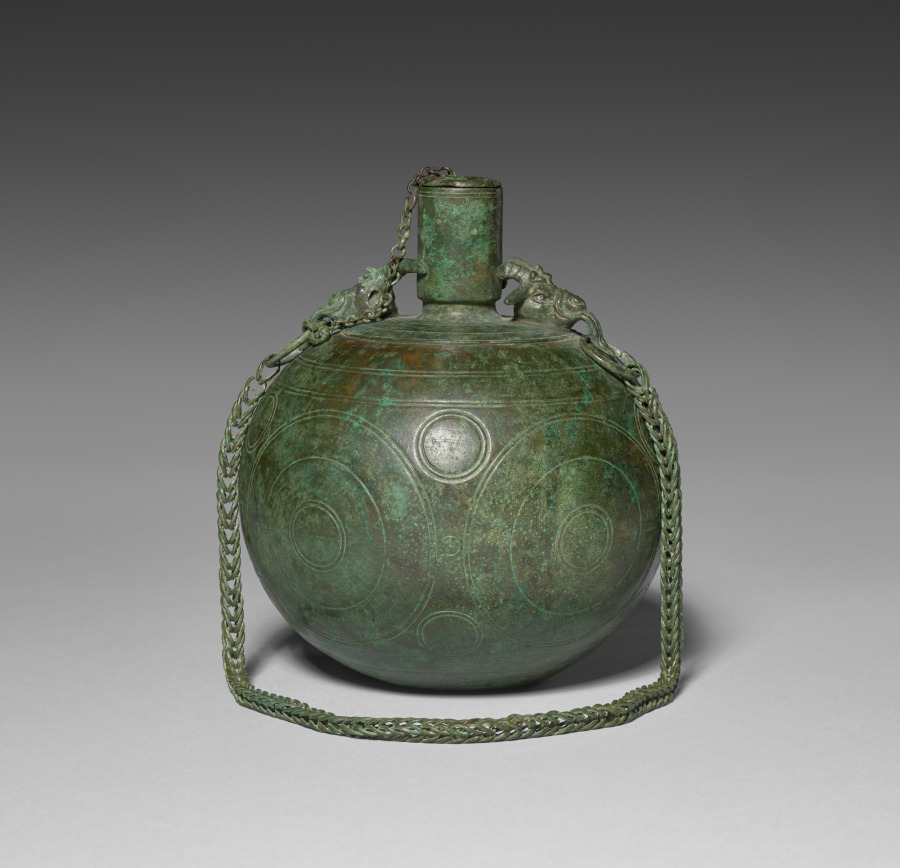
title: Canteen or Balsamarium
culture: Roman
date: 50–250 CE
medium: Bronze, cast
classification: Metalwork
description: A utilitarian container, this nearly spherical cast bronze vessel survives in surprisingly good condition. Two goat heads on the shoulder, each with inlaid silver eyes, serve as decorative attachments, holding two hand-wrought linked chains – a shorter one to secure the stopper and a longer one for hanging or carrying the vessel. The round body of the vessel is nicely complemented by a decorative program of shallowly incised bands and concentric circles.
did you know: The goat heads on the shoulder of this vessel each have inlaid silver eyes.